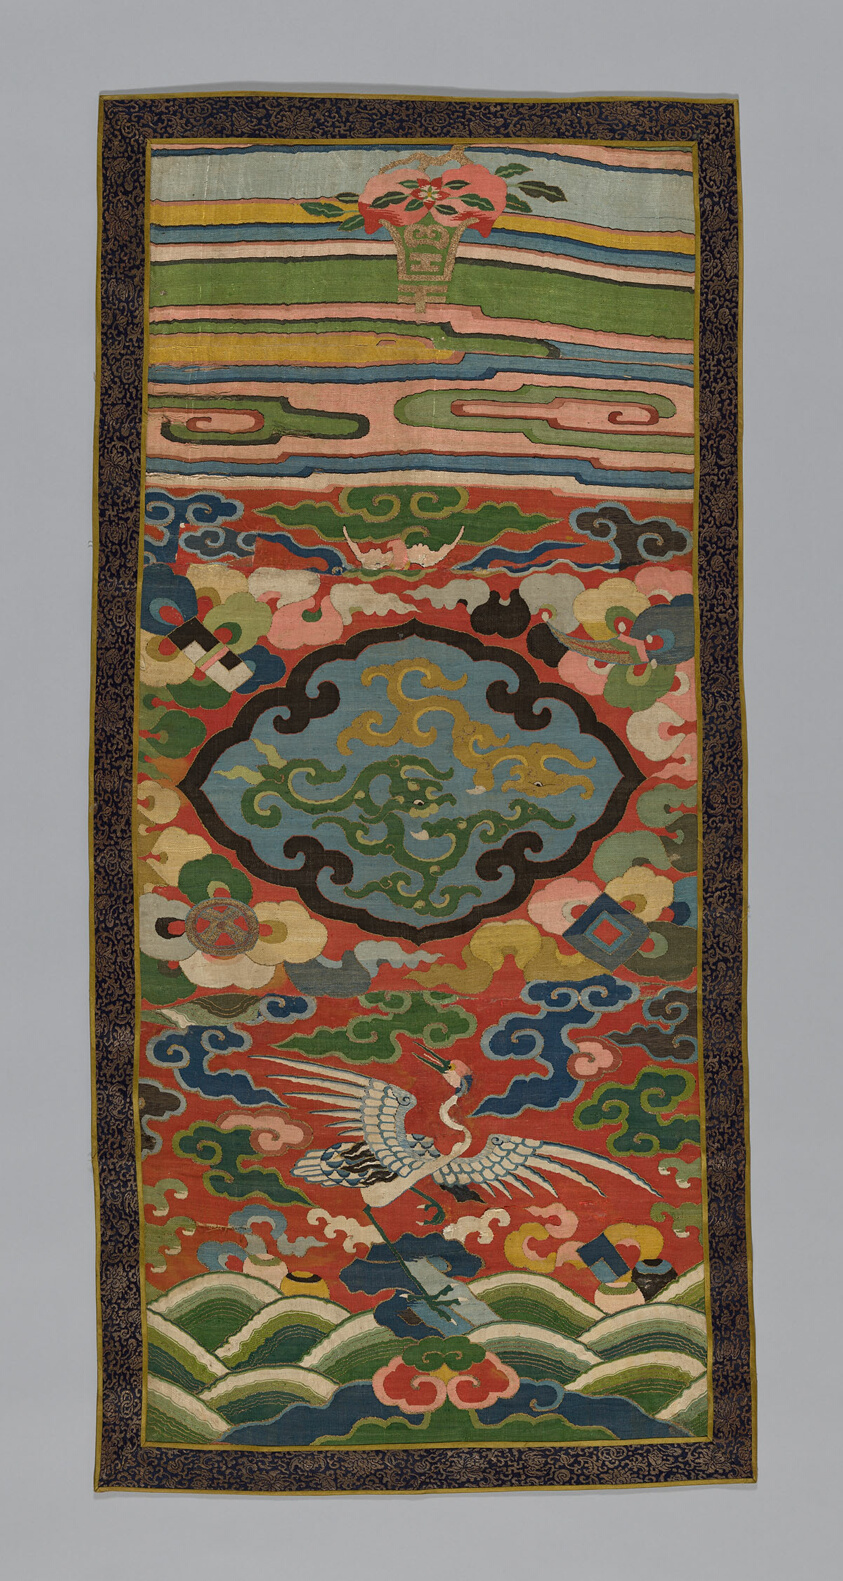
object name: Textile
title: Panel (Furnishing Fabric)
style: qing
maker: China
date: Qing dynasty (1644–1911), 1600/44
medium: Silk and gilt and silvered paper on linen and silk core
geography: China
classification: textile; weaving; furnishing textile